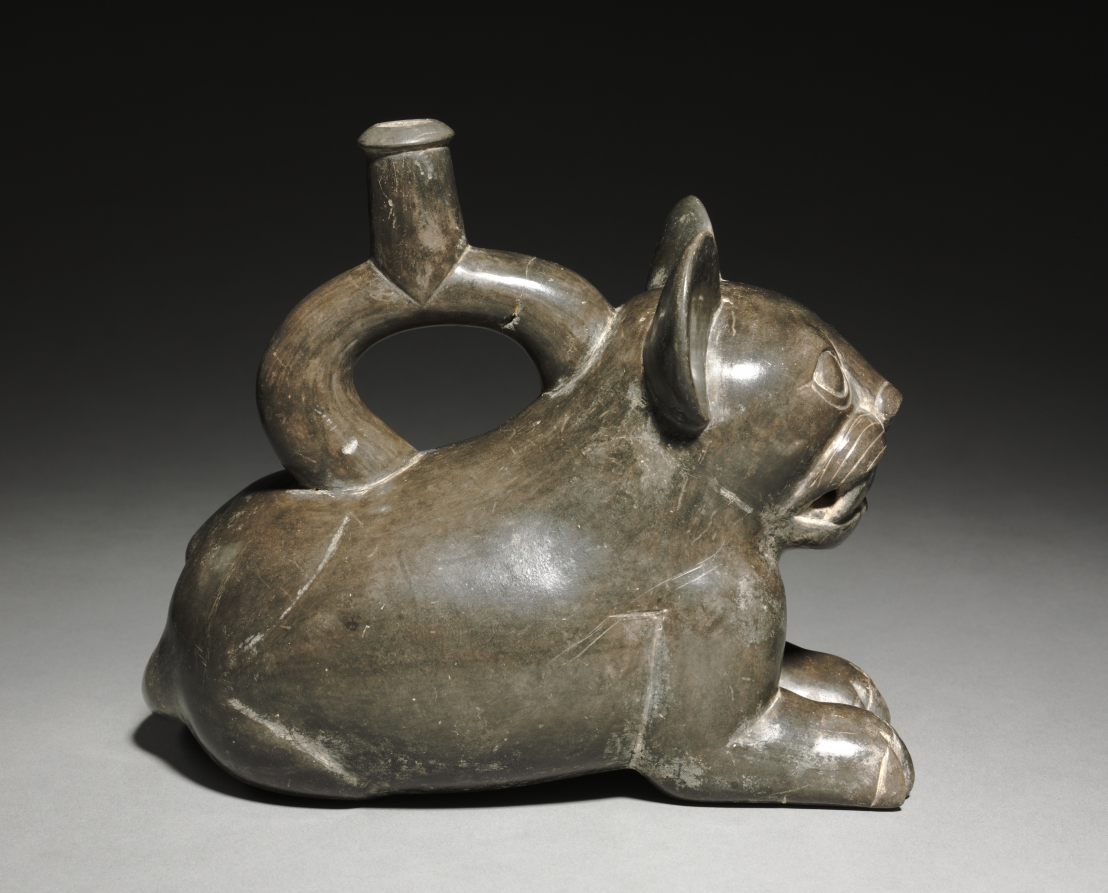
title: Feline Vessel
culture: Central Andes, North Coast, Moche people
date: 200–850 CE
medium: ceramic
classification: Ceramic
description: This darkware vessel is early Moche and demonstrates the transition from earlier North Coast cultures, which used smudge firing and post-fire pigmentation, to Moche times, which saw the adoption of new, higher-oxygen firing technologies and the use of slips applied before firing.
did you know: The Moche were known for their fine animal representations.